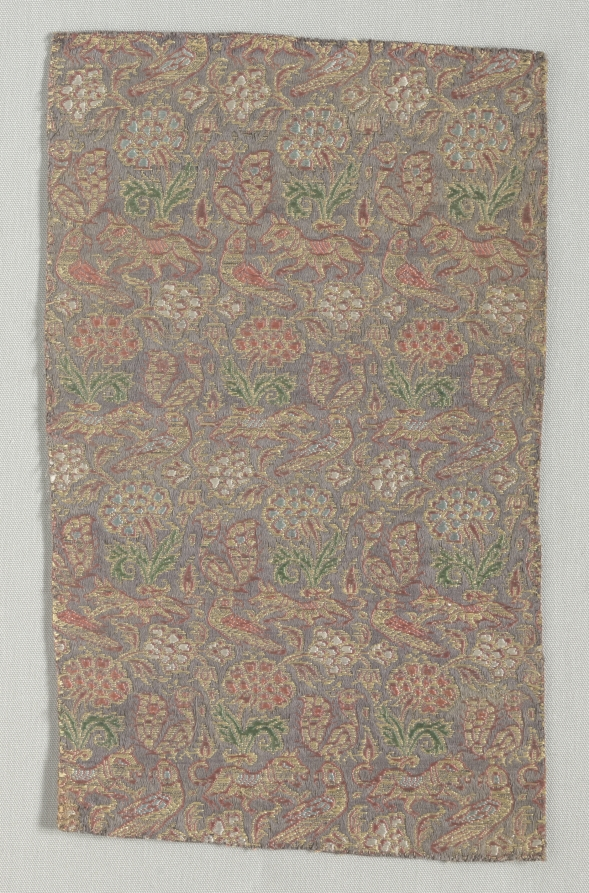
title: Fragment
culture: Iran, Kashan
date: 1700s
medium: lampas weave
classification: Textile